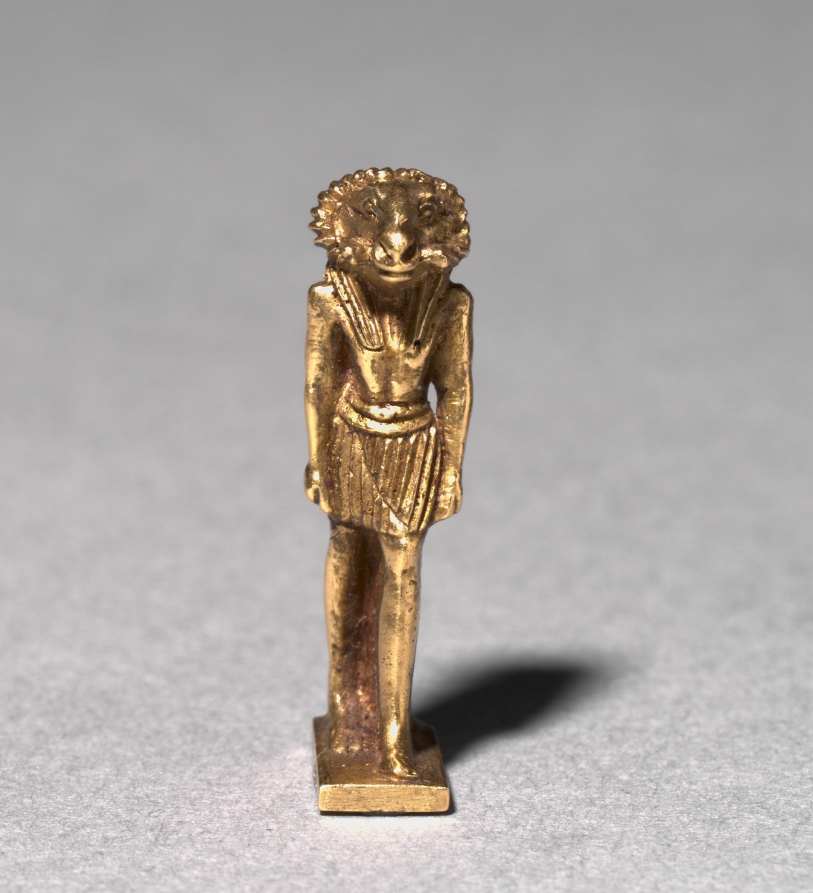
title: Amulet of a Ram-Headed Deity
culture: Egypt, Third Intermediate (1069–715 BCE), Dynasty 22 or later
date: c. 945–715 BCE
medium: gold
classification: Amulets